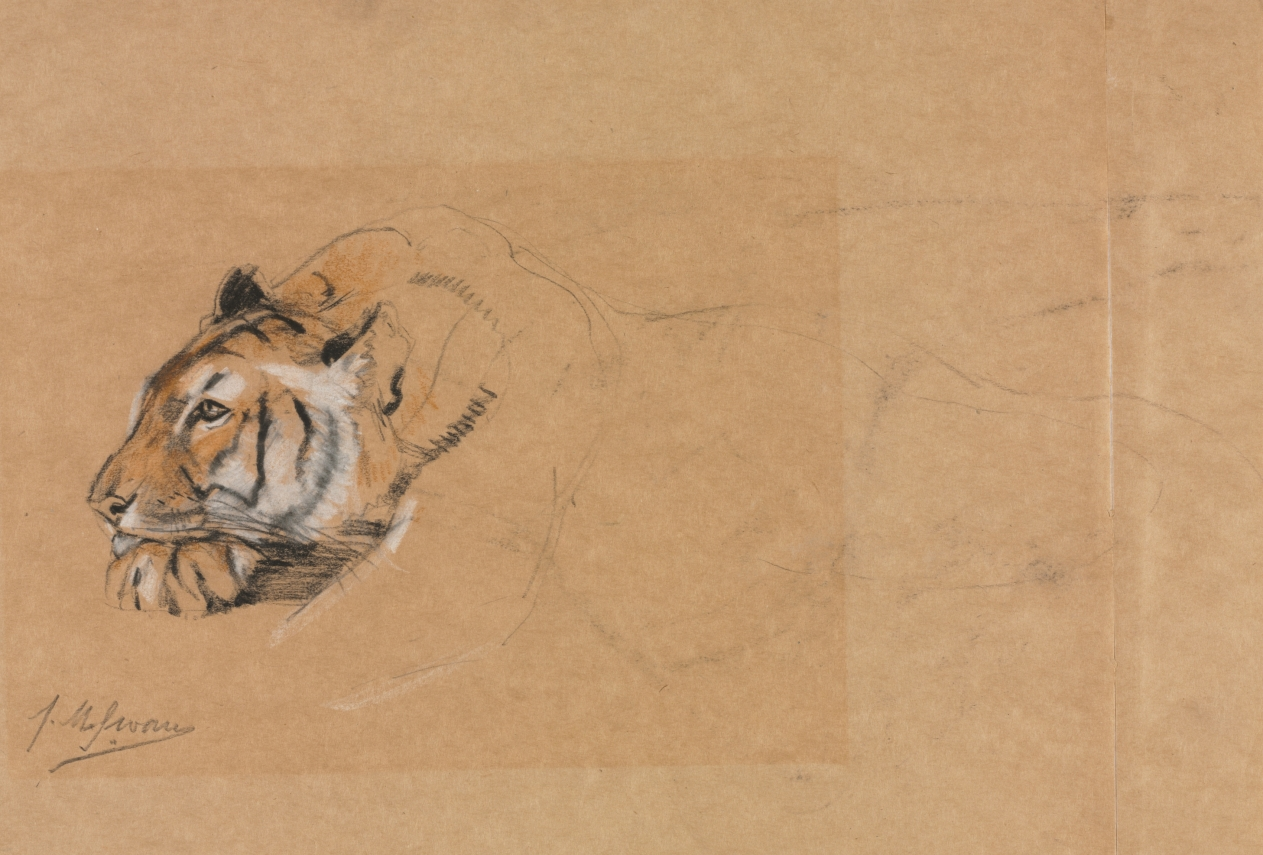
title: Tiger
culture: England, 19th-20th century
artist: John Macallan Swan (British, 1847–1910)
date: c. 1867–1910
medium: charcoal and chalk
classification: Drawing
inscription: In charcoal, recto, lower left: "J.M. Swan (signed)"